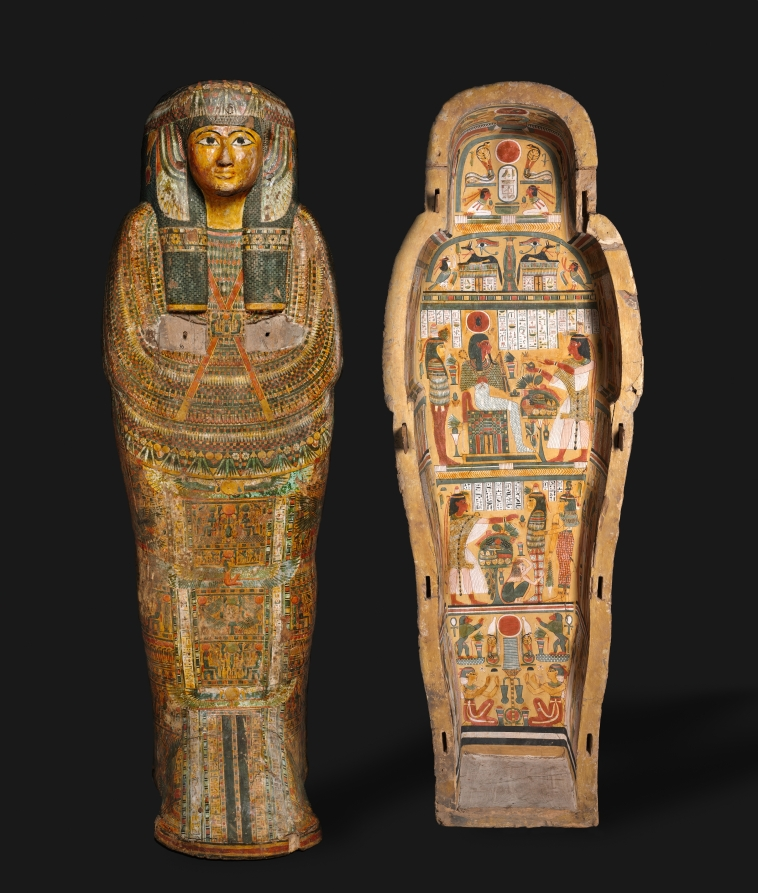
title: Coffin of Nesykhonsu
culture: Egypt, Thebes, Third Intermediate (1069–715 BCE), Dynasties 21–22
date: c. 976–889 BCE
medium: gessoed and painted sycamore fig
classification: Funerary Equipment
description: Egyptian coffins told stories and illustrated spells to help the deceased transition safely to the afterlife. Inside Nesykhonsu's coffin there are two jackals, one facing right and the other left, near the top. Here, the jackal represents the powerful deity Anubis, the god of the afterlife and embalming.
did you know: Two of Nesykhonsu's titles, "Lady of the House" and "Singer of the Choir of Mut the Great," are written on the outside of the coffin.